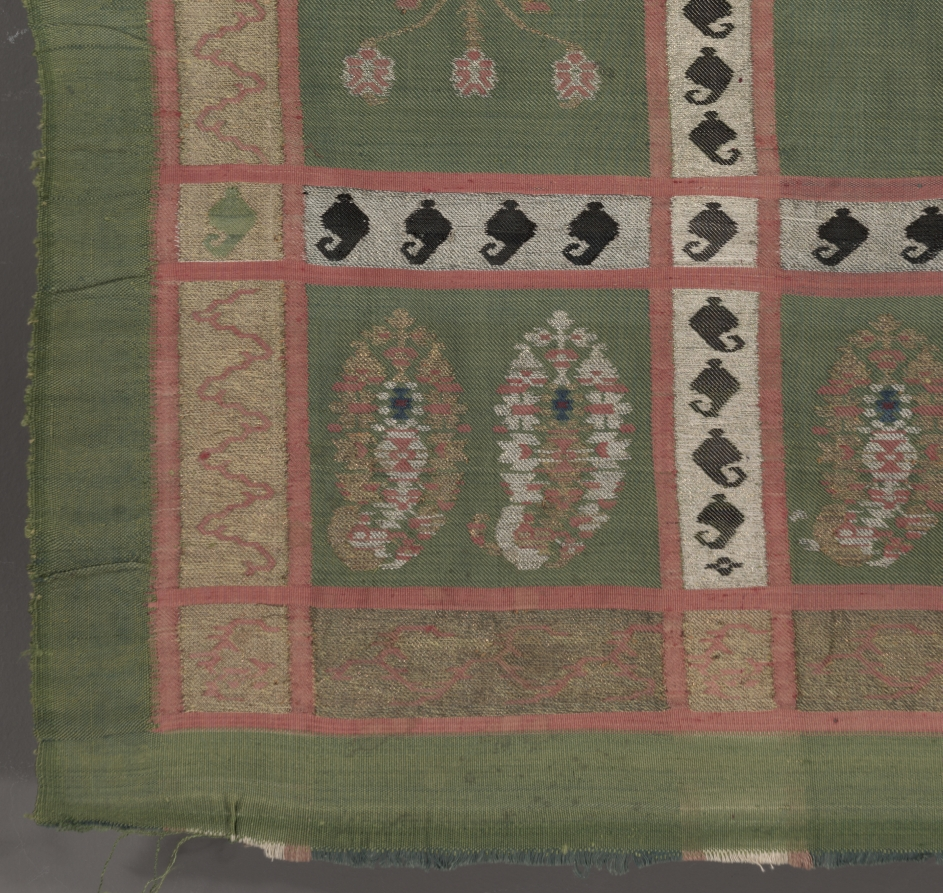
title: Scarf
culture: Iran, 19th century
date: 1800s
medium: twill and tabby weaves, brocaded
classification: Textile